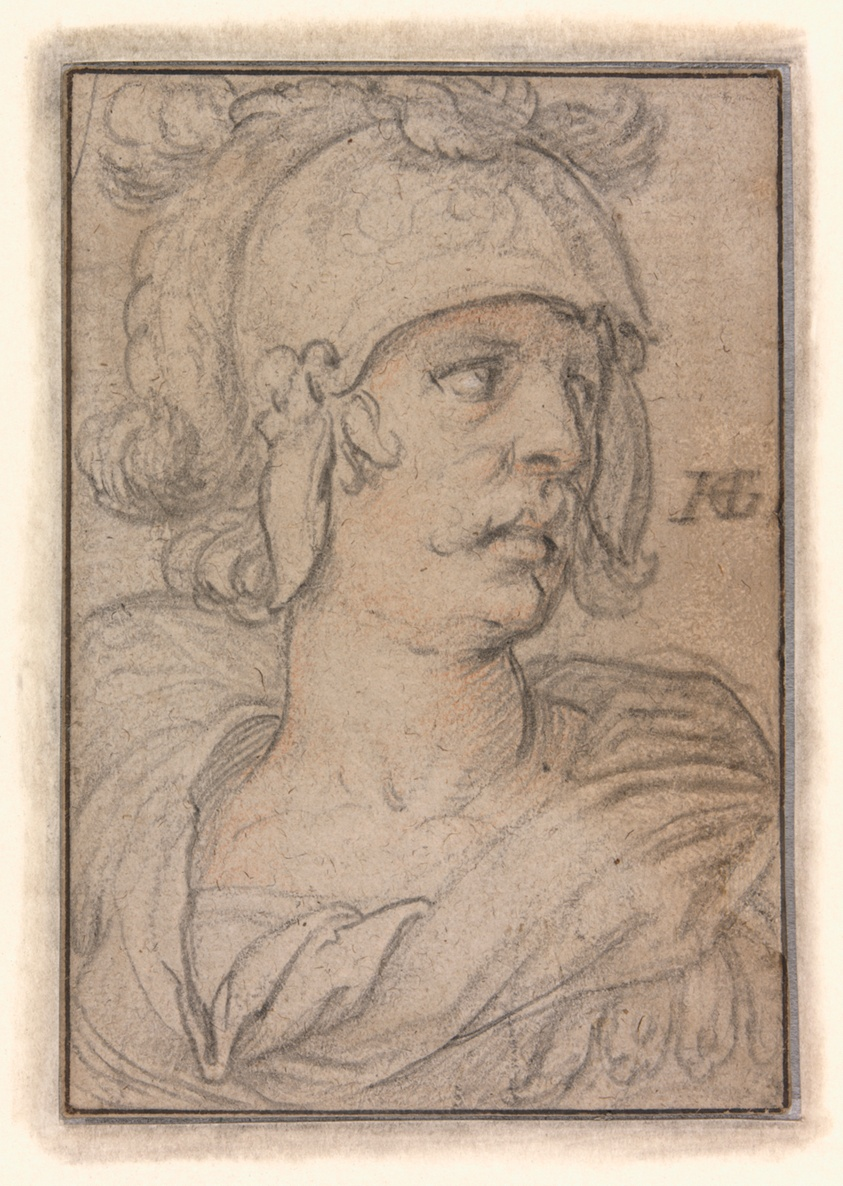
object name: Drawing and Watercolor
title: Bust of a Warrior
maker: Hendrick Goltzius (Dutch 1558-1617)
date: 1586/88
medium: Black chalk, with red chalk, heightened with traces of white chalk, ruled with pen and black ink, on cream laid paper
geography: Netherlands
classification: drawings (visual works); chalk; paper; prints and drawing